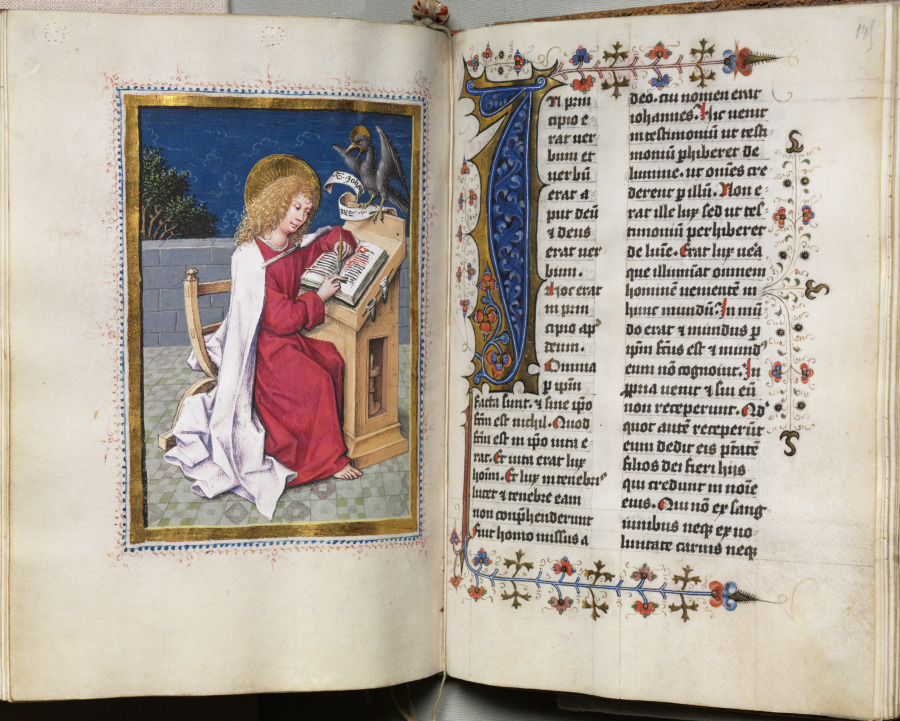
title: Gospel Book with Evangelist Portraits: Decorated Initial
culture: Germany, Middle Rhine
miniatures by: Master of the House-Book (German, c. 1470–1500)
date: c. 1480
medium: ink, tempera, and gold on vellum; original blind stamped leather binding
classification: Bound Volume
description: The four gospels are preceded by a full-page portrait miniature of the appropriate evangelist. Per tradition, they are represented as contemporary scribes surrounded by all the tools of their trade— ink pots, quill pens, and penknives. The anonymous illuminator of these miniatures, called the Hausbuch Master, is known primarily for an album of lively drawings as well as some 90 copper engravings now in Amsterdam. He was also apparently a panel painter of some distinction. The skillful pen work, tracery, and vine scrolls, as well as the large initials, are the work of other artists.The binding is original.